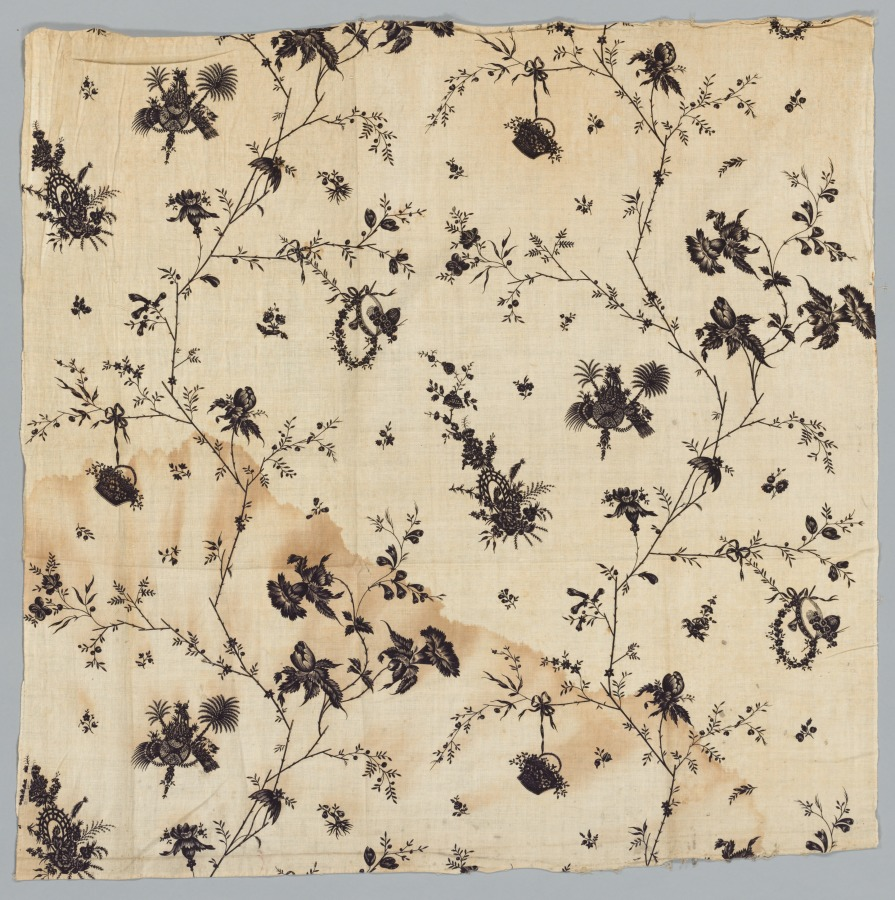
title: Fragment of Printed Cotton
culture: England, late 18th century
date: 1775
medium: copperplate printed cotton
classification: Textile